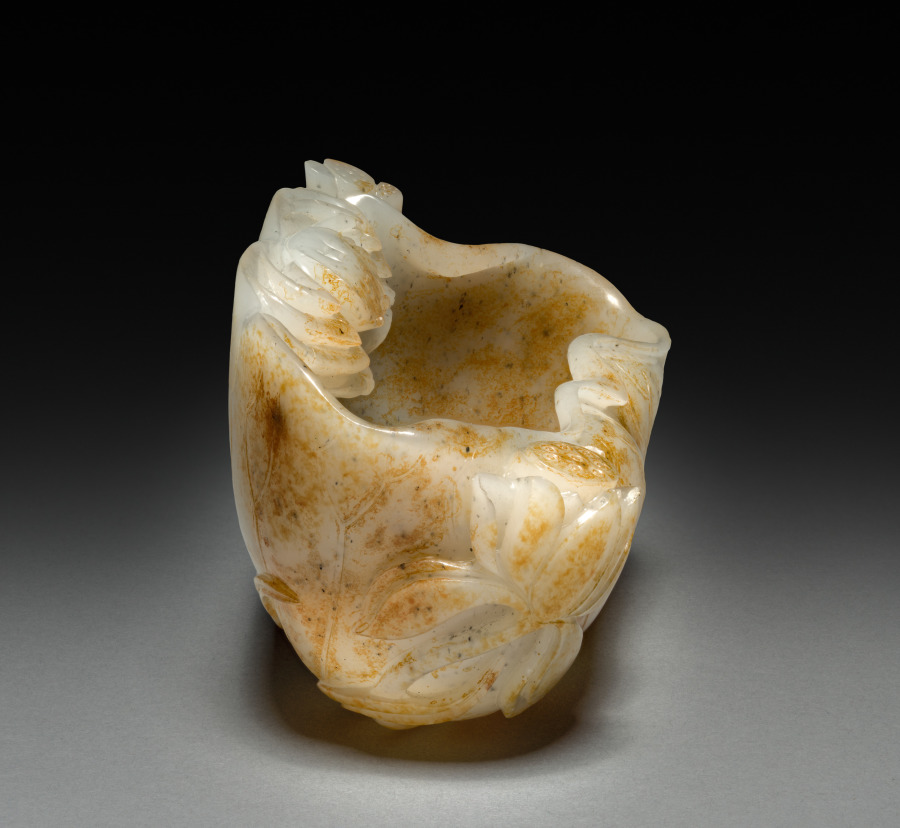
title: Cup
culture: China, Qing dynasty (1644-1911), Kangxi reign (1662-1722)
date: 1662–1722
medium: jade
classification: Jade